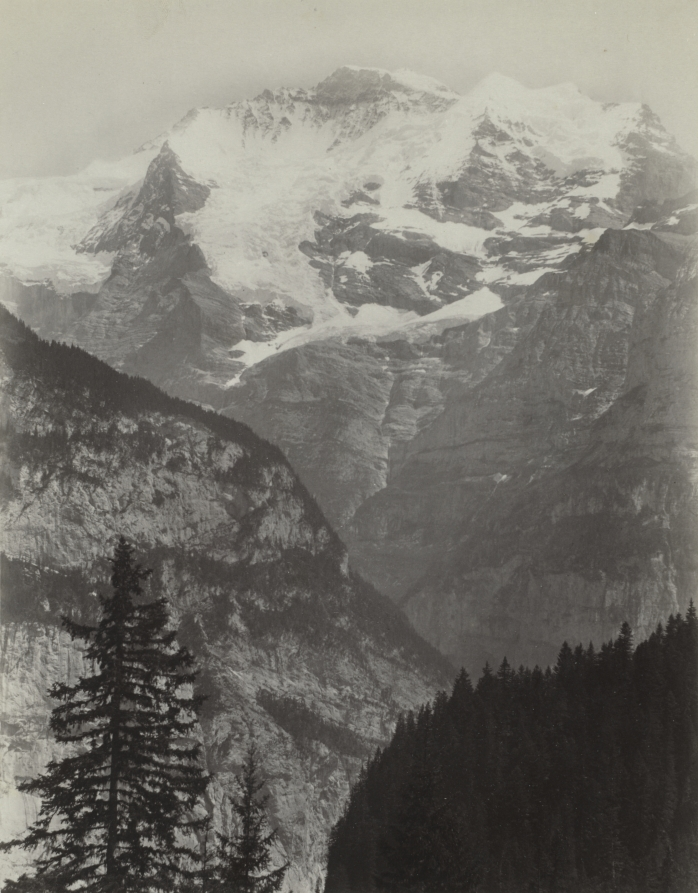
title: Jungfrau, View from Mürren, Switzerland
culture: France, 19th century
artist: Charles Soulier (French, 1840–1875)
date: c. 1860s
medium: albumen print from glass negative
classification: Photograph